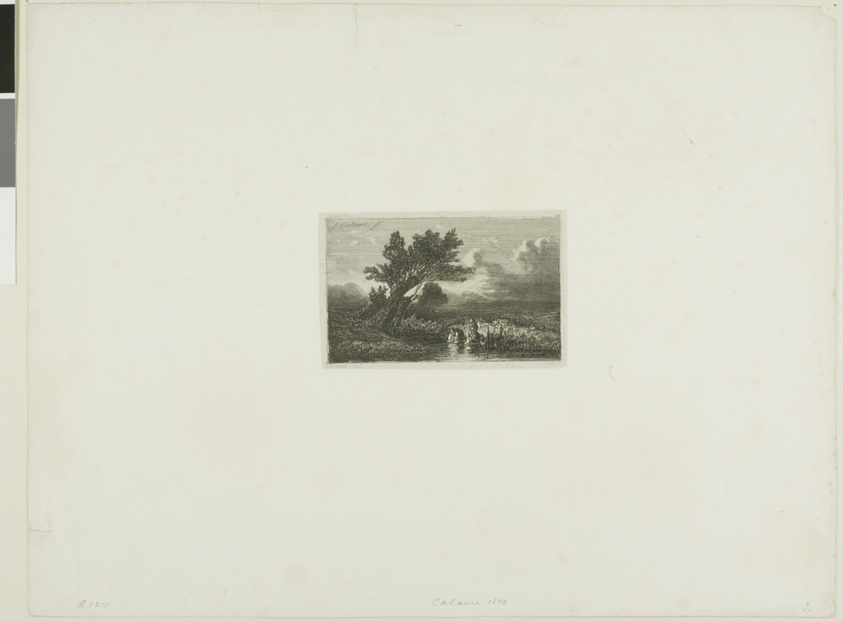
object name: Print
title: Alpine Landscape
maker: Alexandre Calame (Swiss, 1810-1864)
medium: Etching on paper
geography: Switzerland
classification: etching; print; prints and drawing